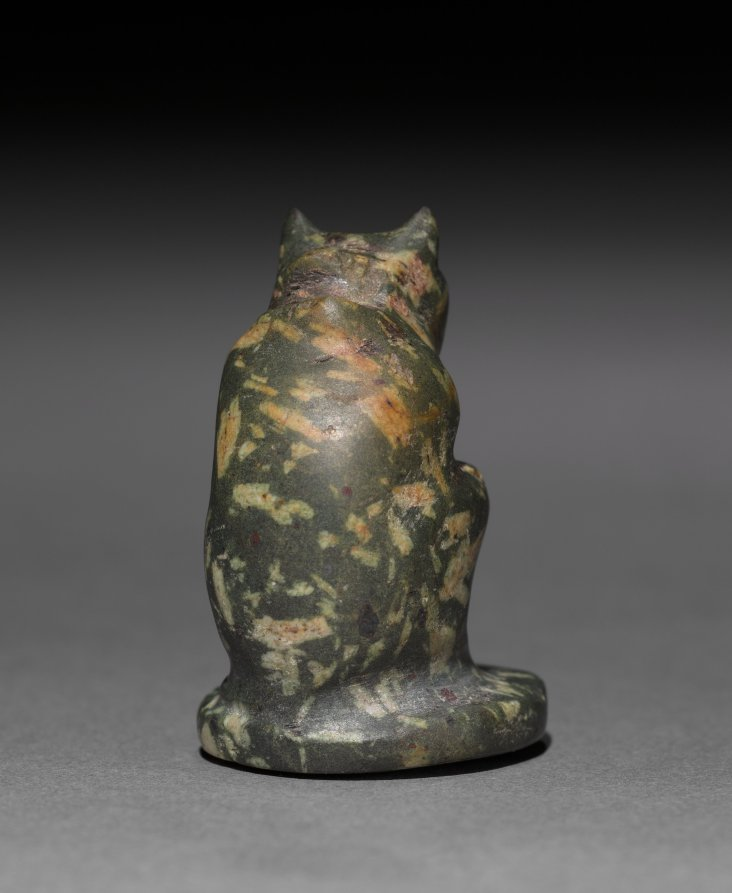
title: Amulet of a Crouching Bear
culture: Egypt, Late period (715–332 BCE)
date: 664–332 BCE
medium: green porphyry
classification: Amulets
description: For the Egyptians, the bear was an exotic species, and as early as 2400 BC it figures, though sporadically, in scenes of foreign tribute on tomb and temple walls. Representations of bears in the round are extremely rare. This bear, masterfully carved in hard greenish stone flecked with white, is a little gem. The animal rests on its haunches on a circular base, head bent forward, legs drawn up in a posture not unlike that of the classic pose for Egyptian gods. Sensitivity to such delightful details as the animal's perked-,up ears, tiny face, and wrinkled neck make this tiny giant a rare prize.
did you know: The bear is not native to Egypt, although until the beginning of this century it survived in Lebanon.